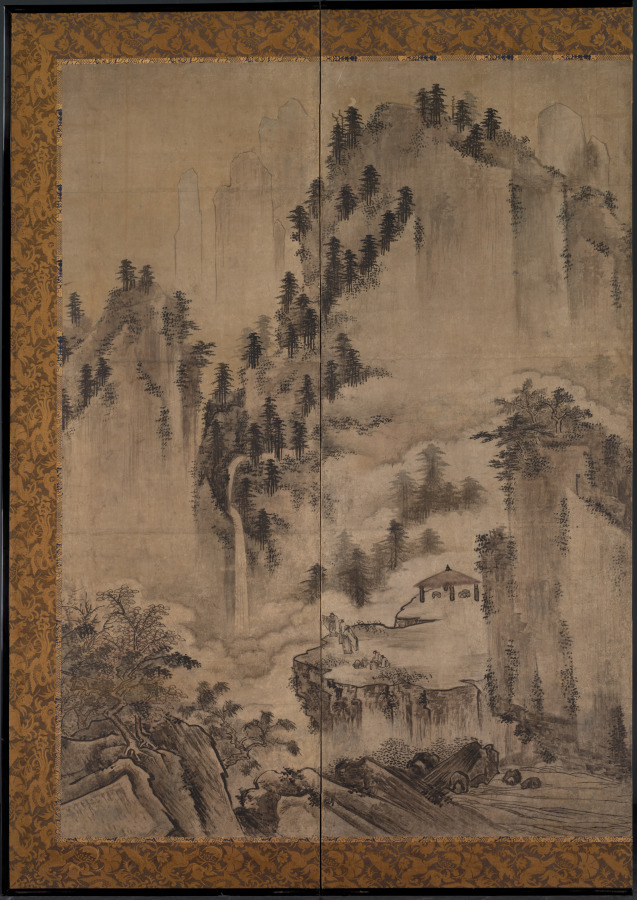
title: Landscape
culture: Japan, Muromachi period (1392–1573)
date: 1550–99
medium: One of a pair of six-panel folding screens; ink and color on paper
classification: Painting